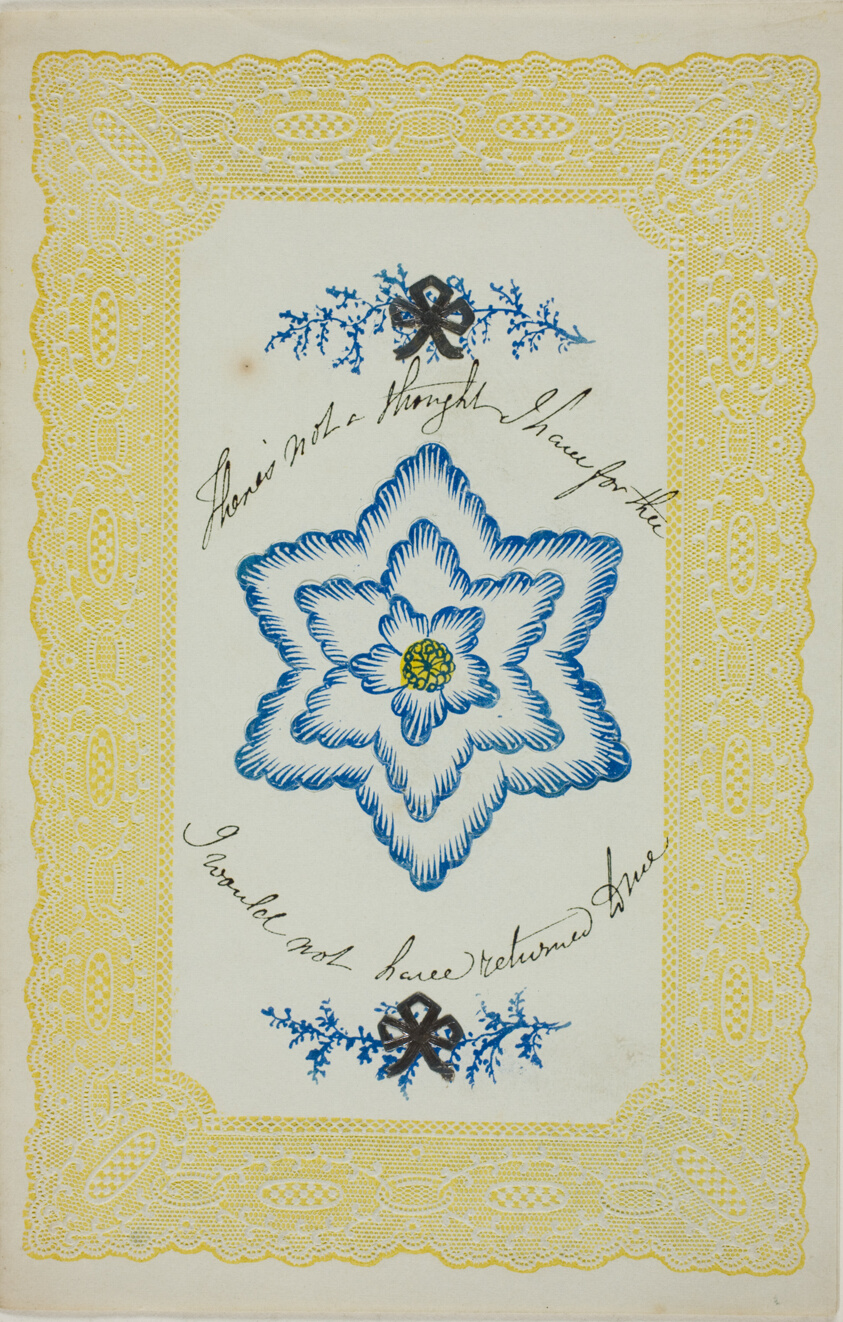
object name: Drawing and Watercolor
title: There's not a Thought (valentine)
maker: Unknown Artist; English, 19th century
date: c. 1840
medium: Watercolor and pen and black ink, with collaged elements on gold accented and embossed ivory wove paper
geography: England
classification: valentine; prints and drawing; paper